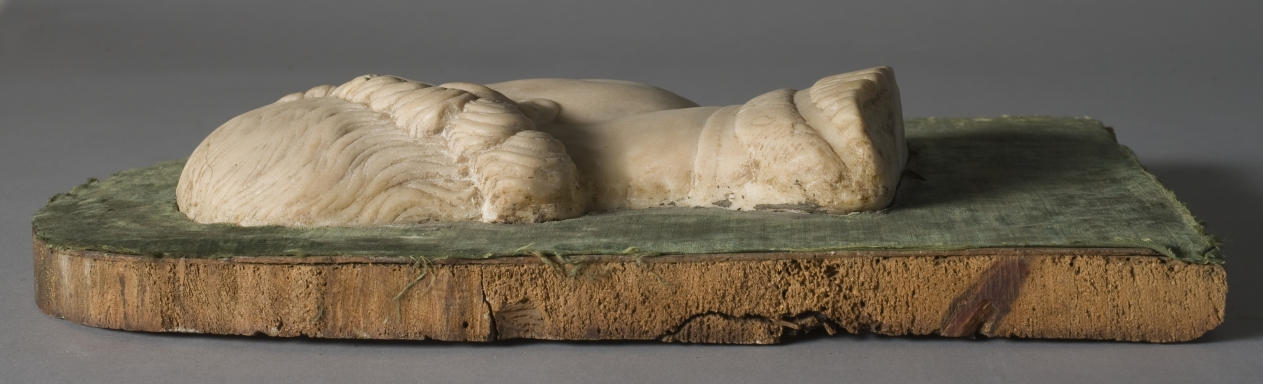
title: Portrait of Francesco Sforza and Frame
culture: Italy, Lombardy, 15th century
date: 1450–1499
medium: marble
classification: Sculpture